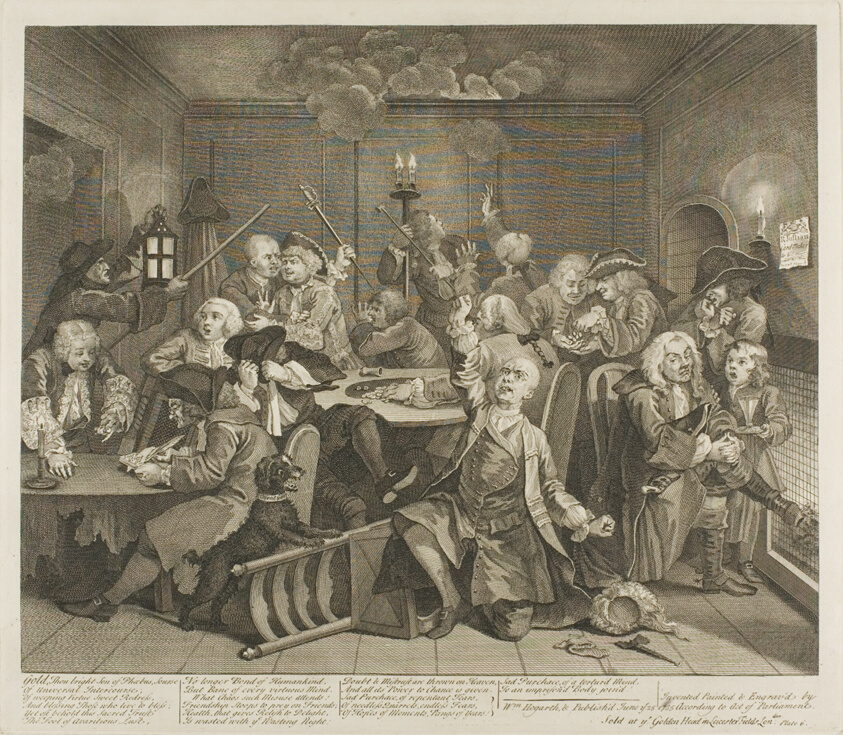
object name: Print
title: Plate Six, from A Rake's Progress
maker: William Hogarth (English, 1697-1764)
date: June 1735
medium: Etching and engraving in black on ivory laid paper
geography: England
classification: etching; print; prints and drawing